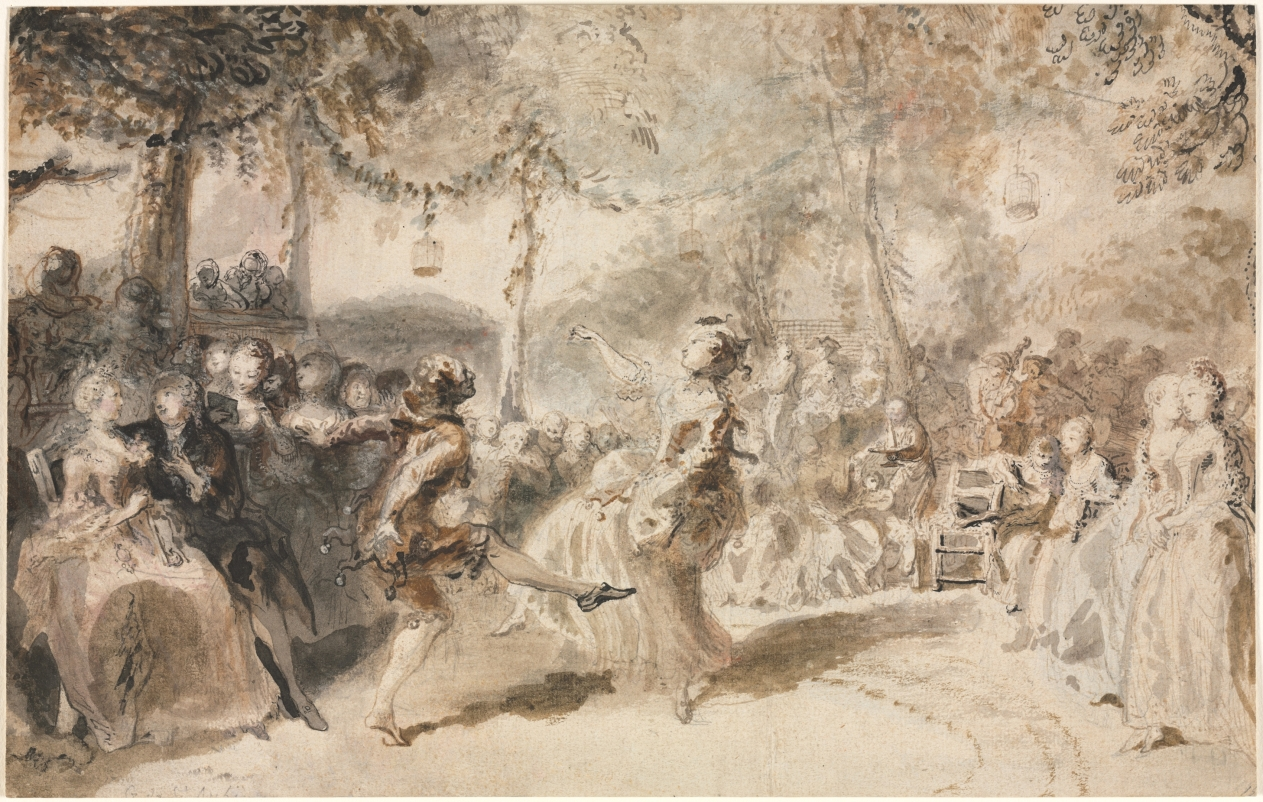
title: Costumed Dancers Performing in a Garden Tavern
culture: France, 18th century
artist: Gabriel de Saint-Aubin (French, 1724–1780)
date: 1756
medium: brush and brown and gray wash, with gouache, watercolor, and traces of graphite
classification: Drawing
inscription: lower left, in brown ink: 17[60?]; lower left, in graphite: G de St Aubin [partially cut off]; verso, visible through transmitted light, lower left: [aif?]; lower left: Fragonard; lower right: 22 / [illegible] / 22; verso of secondary support, center, in graphite: N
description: Gabriel de Saint-Aubin was known for his rapidly executed, sketchy style, often used to depict performances and social scenes. The exaggerated lifted legs of the dancers seen here imply a comic, theatrical style; no social dance during the 18th century would have permitted such pronounced gestures, especially for a woman. Both dancers wear jackets with irregular hemlines decorated with round bells similar to those found on jesters’ costumes. The lanterns and swags of flowers strung from trees and the small orchestra playing on the right suggest a guinguette, or outdoor tavern with a pleasure garden.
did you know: Gabriel de Saint-Aubin reused the female dancer in another drawing from 1760.